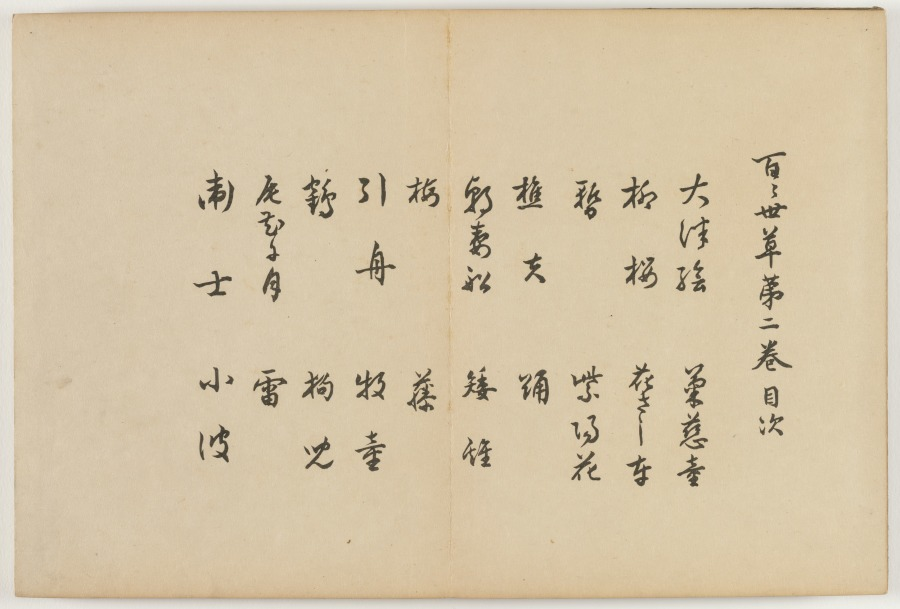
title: Flowers of a Hundred Worlds (Momoyogusa), Vol. 2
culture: Japan, Meiji period (1868–1912)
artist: Kamisaka Sekka (Japanese, 1866–1942)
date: 1909–10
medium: one of a set of three woodblock printed folding-books; ink, color, gold, and silver on paper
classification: Bound Volume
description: This volume from a set of three woodblock printed albums displays the graphic design prowess of Kamisaka Sekka. The images were first distributed one by one to subscribers to the series but later were reissued in bound form, like this book, for mass consumers. Each print features a vignette taken from nature or Japanese literature. Many of the scenes have a long history in Japan, originating in the 900s or 1000s and having been interpreted by all manner of artists since that time. Sekka’s selections hew closely to precedents from the Rinpa style originated by painter Tawaraya Sōtatsu (c. 1570–c. 1640) and calligrapher Hon’ami Kōetsu (1558–1637).